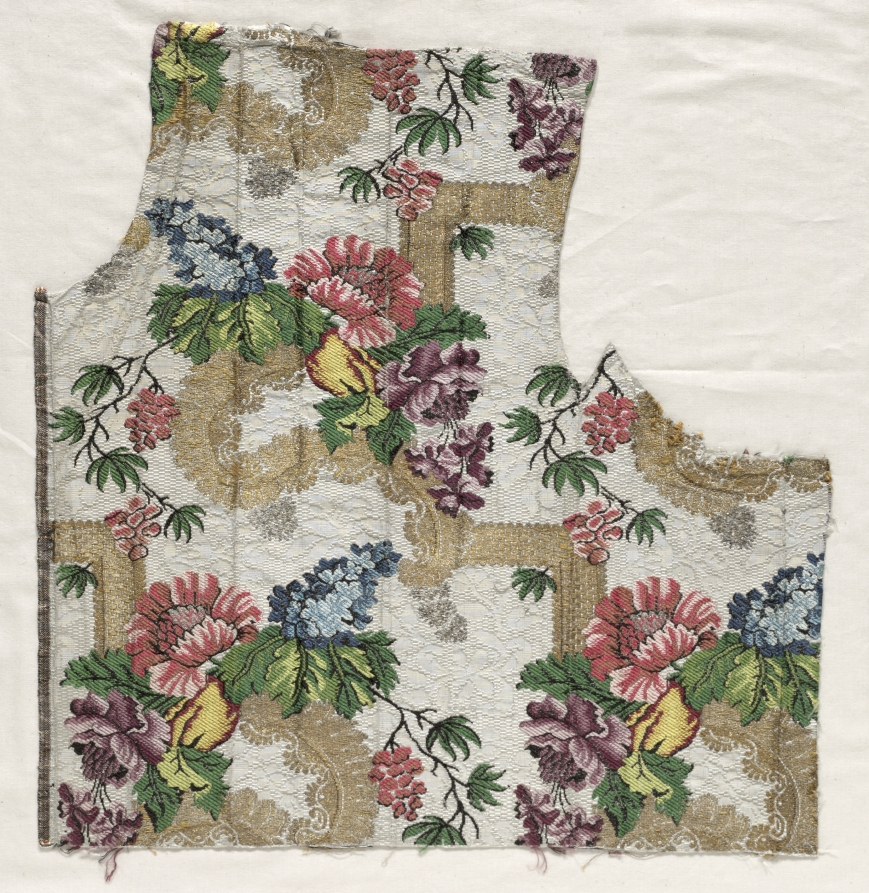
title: Fragment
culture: Spain, mid-18th century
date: mid-18th century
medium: brocaded silk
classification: Textile